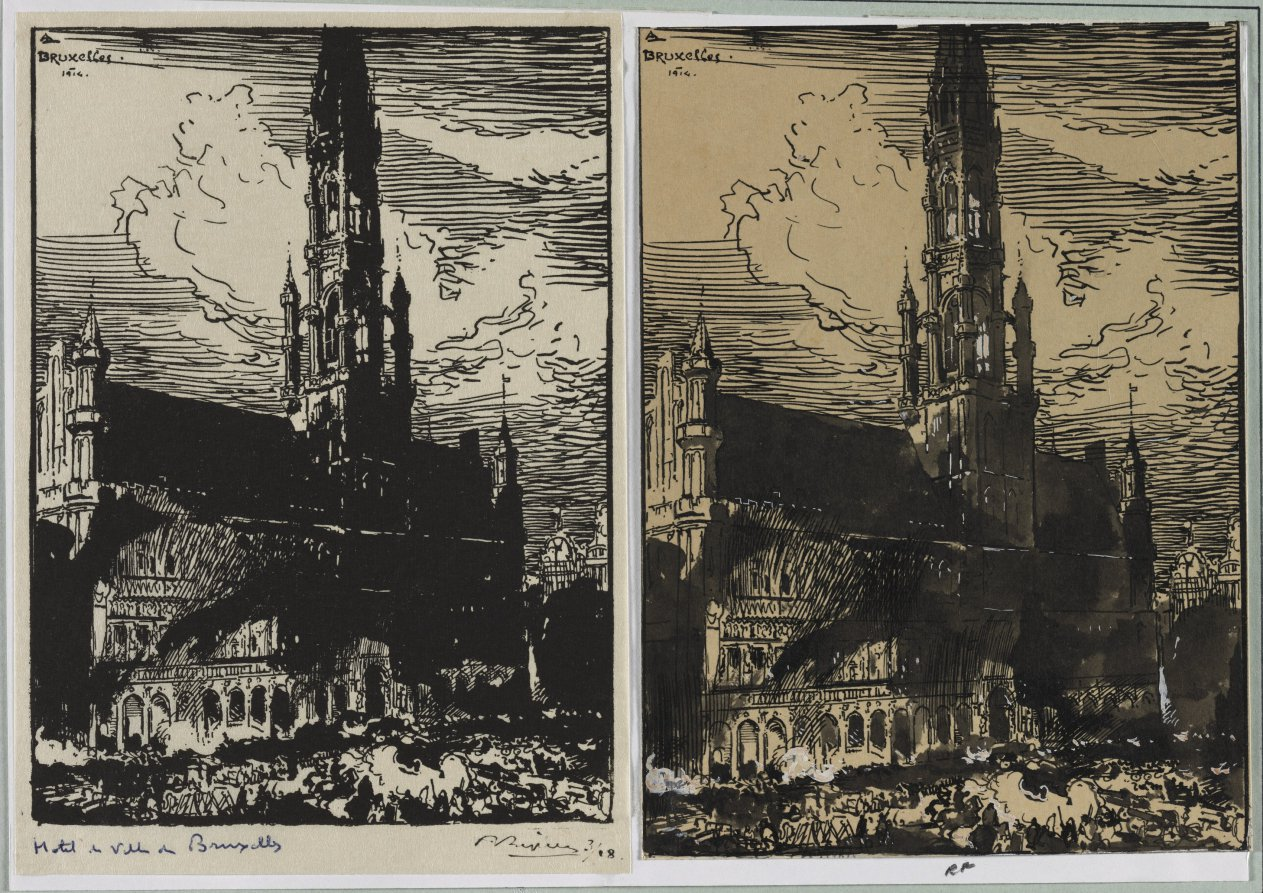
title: Hôtel de Ville de Bruxelles en feu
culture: France, 20th century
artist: Auguste Louis Lepère (French, 1849–1918)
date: 1914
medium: pen and black ink and black wash heightened with white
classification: Drawing